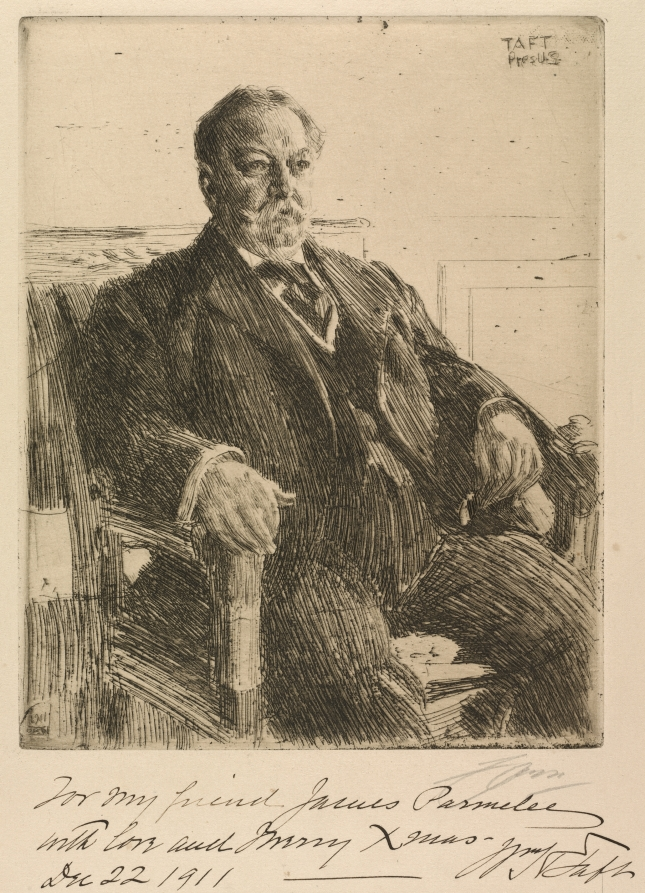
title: President William Howard Taft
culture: Sweden, 20th century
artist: Anders Zorn (Swedish, 1860–1920)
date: 1911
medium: etching, drypoint and roulette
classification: Print